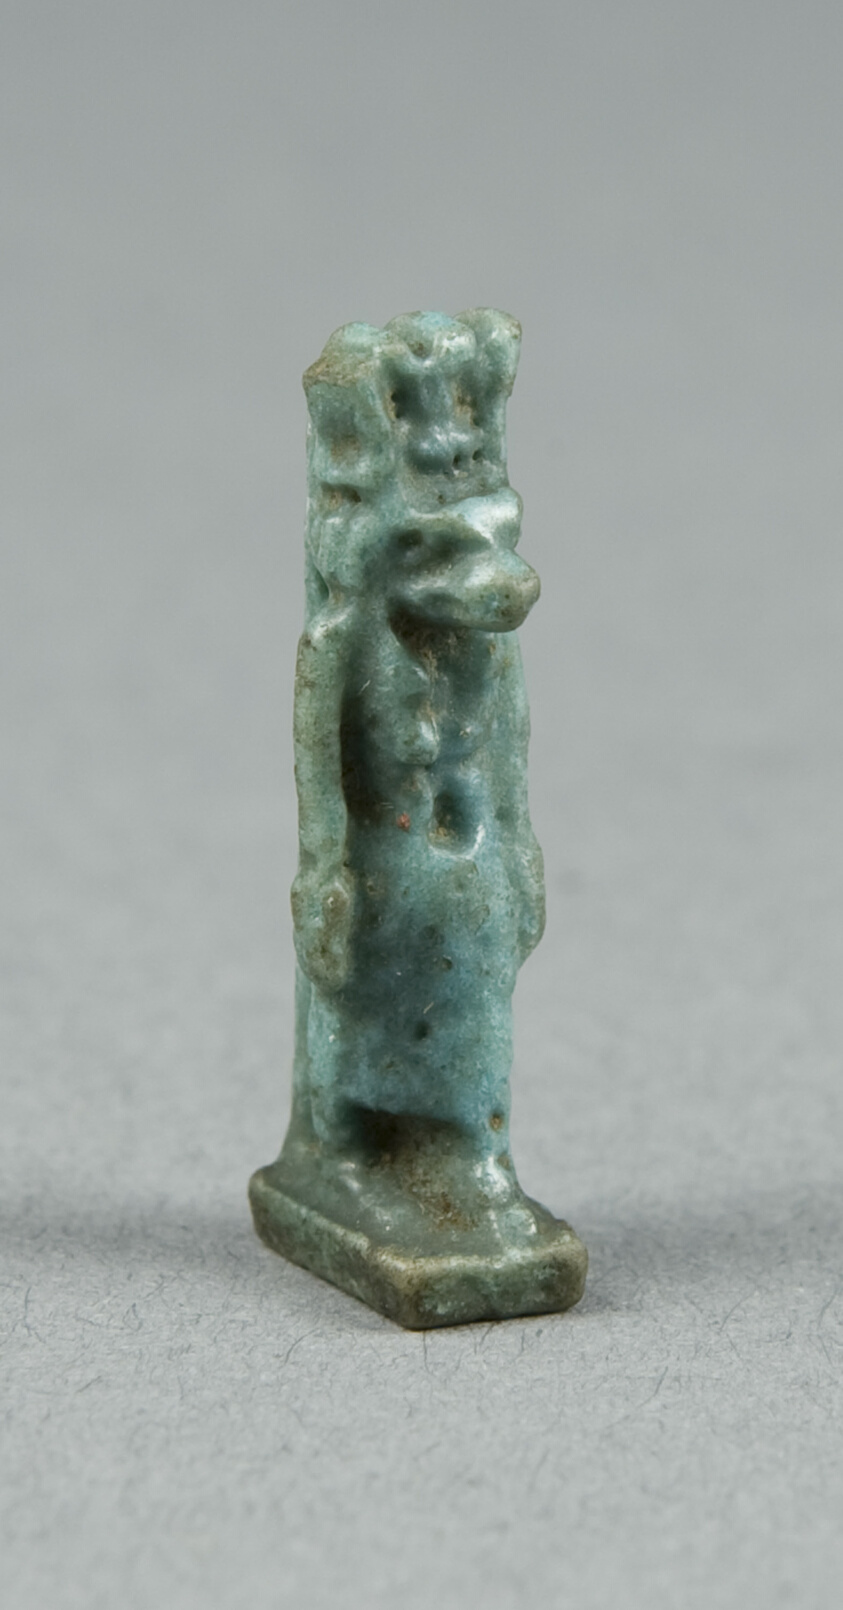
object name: Costume and Accessories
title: Amulet of the Goddess Hathor (?) with Cow's Head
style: egyptian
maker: Egyptian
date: Third Intermediate–Late Period? (about 1069–332 BCE)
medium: Faience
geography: Egypt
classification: amulet; jewelry; ceramics; ancient art; costume; faïence (composite material)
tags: goddesses